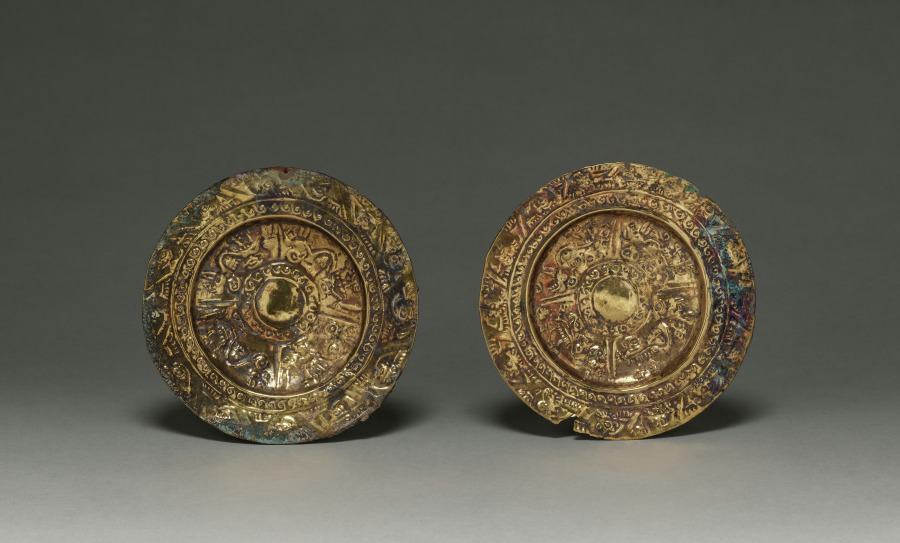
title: Pair of Ear Ornaments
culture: Peru, North Coast, Sicán, 9th-14th century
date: c. 800–1370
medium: hammered and embossed gold alloy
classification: Metalwork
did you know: Wearing large ear ornaments, a privilege of the nobility, permanently stretched the earlobes.